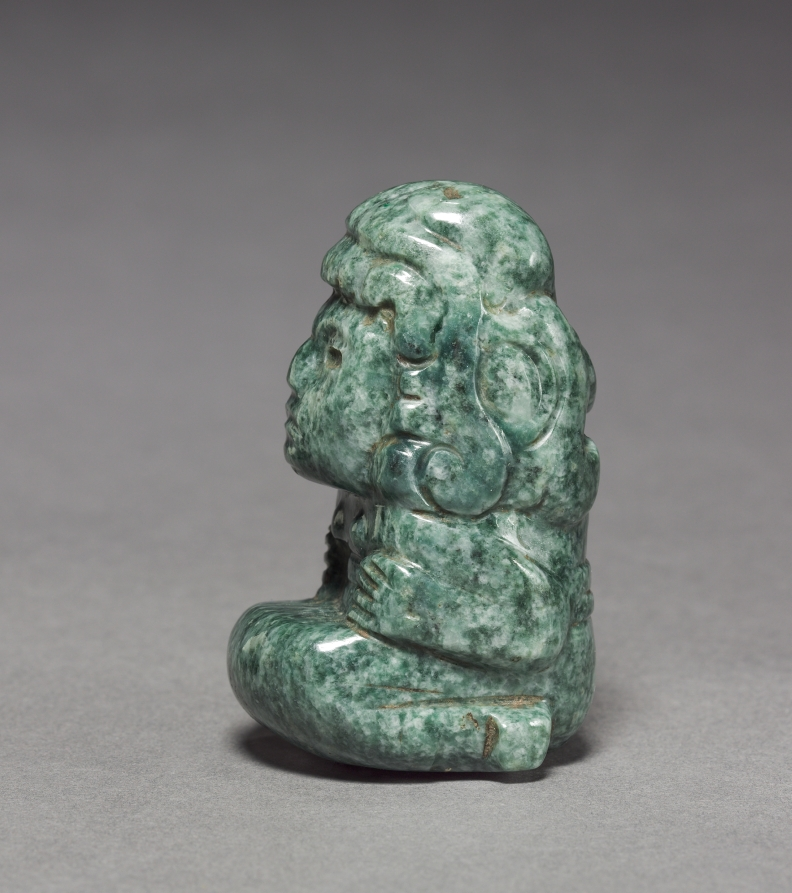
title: Female Figurine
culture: Central Mexico, Aztec, Post-Classic Period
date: 1325–1519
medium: jadeite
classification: Stone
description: Seated in typical female posture, this figurine probably represents an Aztec goddess or ritual impersonator. She wears a monster headdress, but her costume is simple, making specific identification difficult.